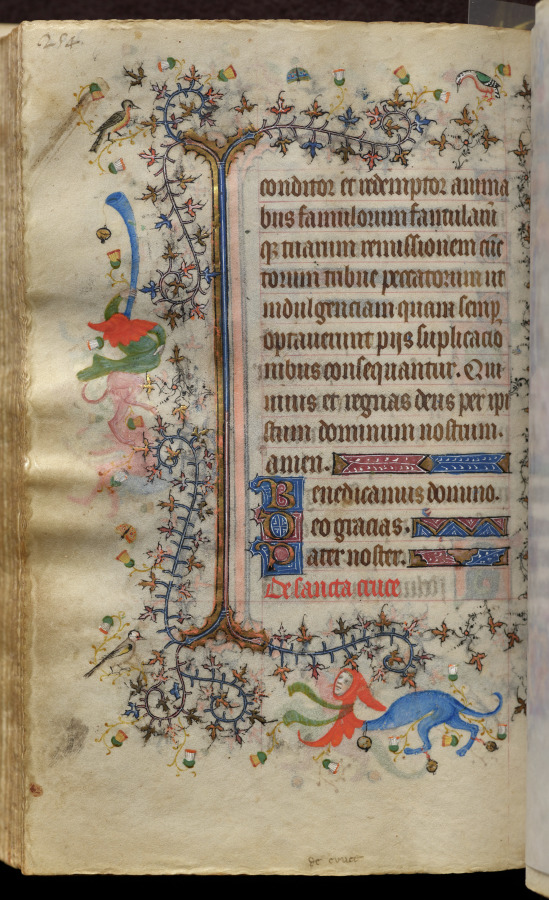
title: Hours of Charles the Noble, King of Navarre (1361-1425): fol. 127v, Text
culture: France, Paris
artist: Master of the Brussels Initials and Associates (French)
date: c. 1405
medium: ink, tempera, and gold on vellum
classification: Bound Volume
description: This precious volume was obviously highly prized by its owner, the French-born King of Navarre, who had his coat of arms painted on no less than twenty folios. Rather than directly commissioning this manuscript from a specific workshop, it seems that Charles the Noble acquired his book of hours -- perhaps ready-made for the luxury market -- while on a trip to Paris in 1404-05. A collaborative effort, six painting styles are evidenced within the pages of this codex, those of two Italians, two Frenchmen, and two Netherlanders. The painter who was responsible for the planning and decoration of the book, and who produced seventeen of the large miniatures, was a Bolognese artist known as the Master of the Brussels Initials. His principal assistant, responsible for most of the borders, was a Florentine who signed his name "Zecho" da Firenze on folio 208 verso.